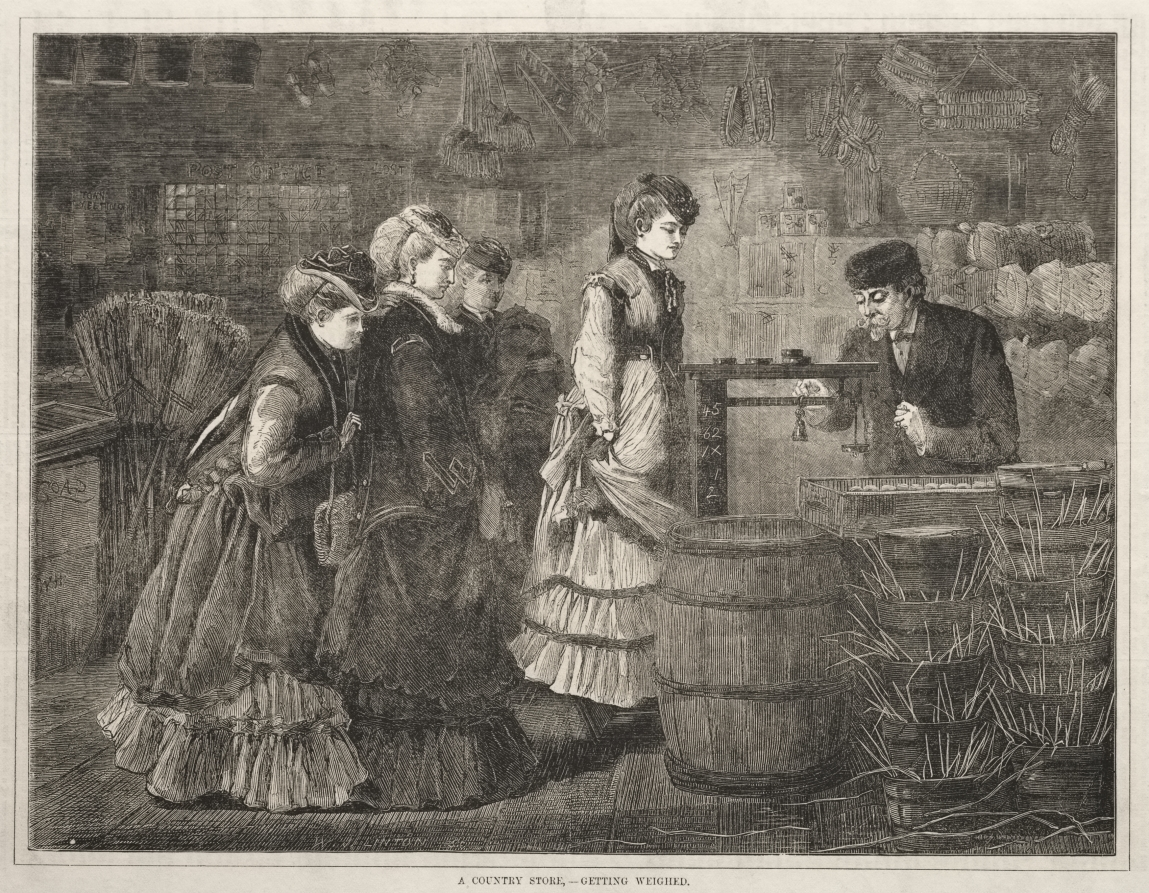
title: A Country Store, Getting Weighed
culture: America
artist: Winslow Homer (American, 1836–1910)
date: 1871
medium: wood engraving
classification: Print